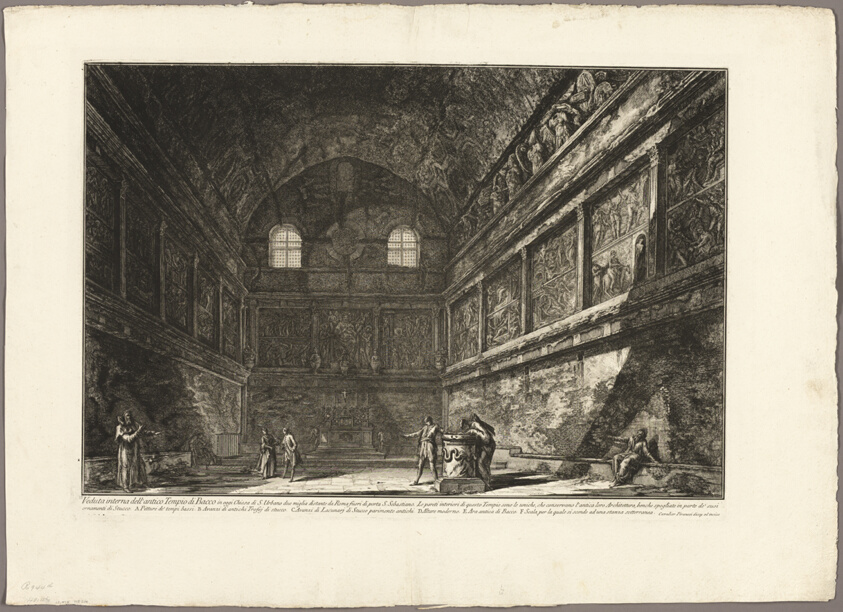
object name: Print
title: Interior view of the ancient Temple of Bacchus, now the church of S. Urbano, two miles from Rome, from Views of Rome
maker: Giovanni Battista Piranesi (Italian, 1720-1778); published by Francesco (Italian, 1758-1810) and Pietro Piranesi (Italian, born 1758/9)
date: 1767, published 1800–07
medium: Etching on heavy ivory laid paper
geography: Italy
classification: etching; print; prints and drawing